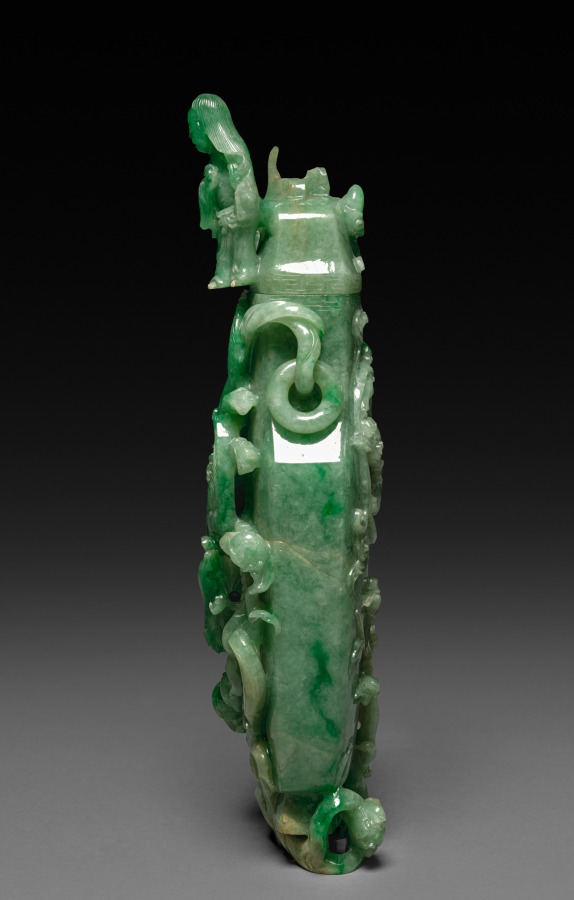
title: Three-Sectional Altar Group: Cylindrical Carving with Phoenix (lid)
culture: China, Qing dynasty (1644-1911)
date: 1644–1911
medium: jade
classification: Jade